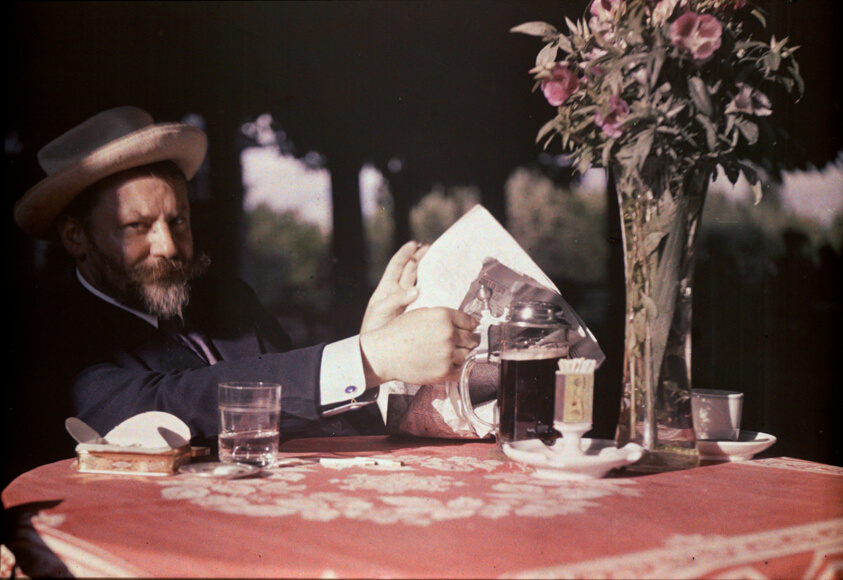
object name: Photograph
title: Frank Eugene Seated at Table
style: Pictorialism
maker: Alfred Stieglitz (American, 1864–1946)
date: 1907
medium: Autochrome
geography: United States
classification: autochrome; photographic process; photography; photograph